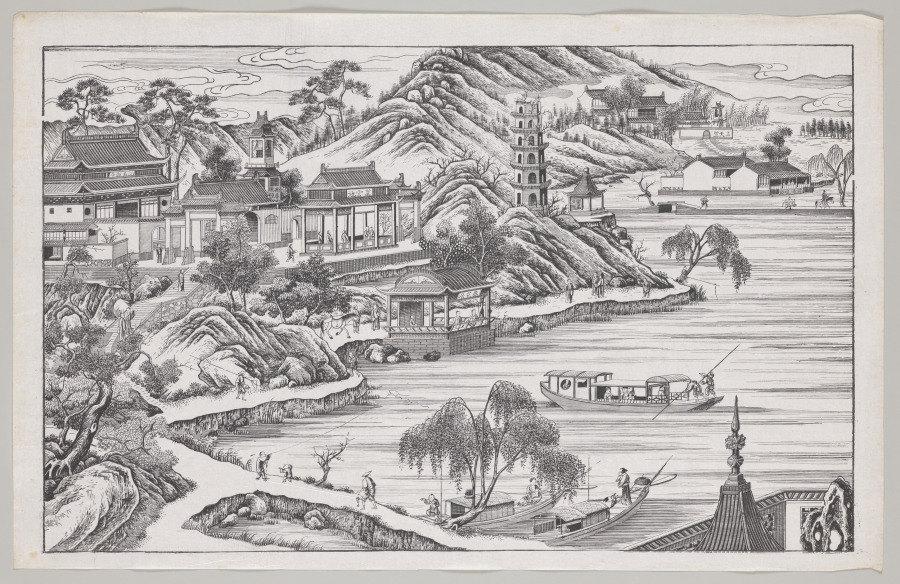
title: Westlake Panorama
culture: China, Qing dynasty (1644–1911), Qianlong reign (1736–95)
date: mid-1700s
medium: One of four woodblock prints; ink on paper; printed with three woodblocks in shades of black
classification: Print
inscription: 信德號 姑蘇管瑞玉頂細西洋畫發客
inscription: The 10 scenes on the four prints are identified by their titles: Print one: 1. Remnant Snow on Broken Bridge (Duanqiao canxue, 斷橋殘雪), 2. Lotus Breeze at Qu Winery (Quyuan fenghe, 曲院風河 [sic]). Print two: 3. Autumn Moon over Placid Lake (Pinghu qiuyue, 平湖秋月), 4. Twin Peaks Piercing the Clouds (Liangfeng chayun, 兩峰插云), 5. Spring Dawn at Su Dike (Sudi chunxiao, 蘇 堤春曉), 11. The emperor’s temporary palace (xinggong, 行宮). Print three: 6. Listening to the Orioles by the Willow Ripples (Liulang wenying, 柳浪 聞鶯), 7. Three Stupas and the Reflecting Moon (Santan yinyue, 三潭印月). Print four: 8. Watching Fish at Flower Cove (Huagang guanyu, 花港觀魚), 9. Sunset at Leifeng Pagoda (Leifeng xizhao, 雷峰夕照). 10. Evening Bell from Nanping Hill (Nanping wanzhong, 南屏晚鍾.) In print two, 11. the emperor’s temporary palace (xinggong 行宮) is also identified.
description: Revived by the southern imperial inspection tours, West Lake imagery became a popular subject during the early Qing dynasty. This panorama is composed of four prints, showing the Ten Scenes of the West Lake in Hangzhou along with other sights. The vanishing point perspective and the hatching lines that depict shading, water, or sky derive from European copperplate prints, introduced by missionaries to China, and were celebrated novelties in 18th-century Suzhou prints. These prints also reached Europe to furnish 18th-century palace interiors.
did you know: Woodblock printing in color reached a height in China in the 1600s to 1700s. The prints were executed by means of sets of separate blocks, each carved to print a different color.